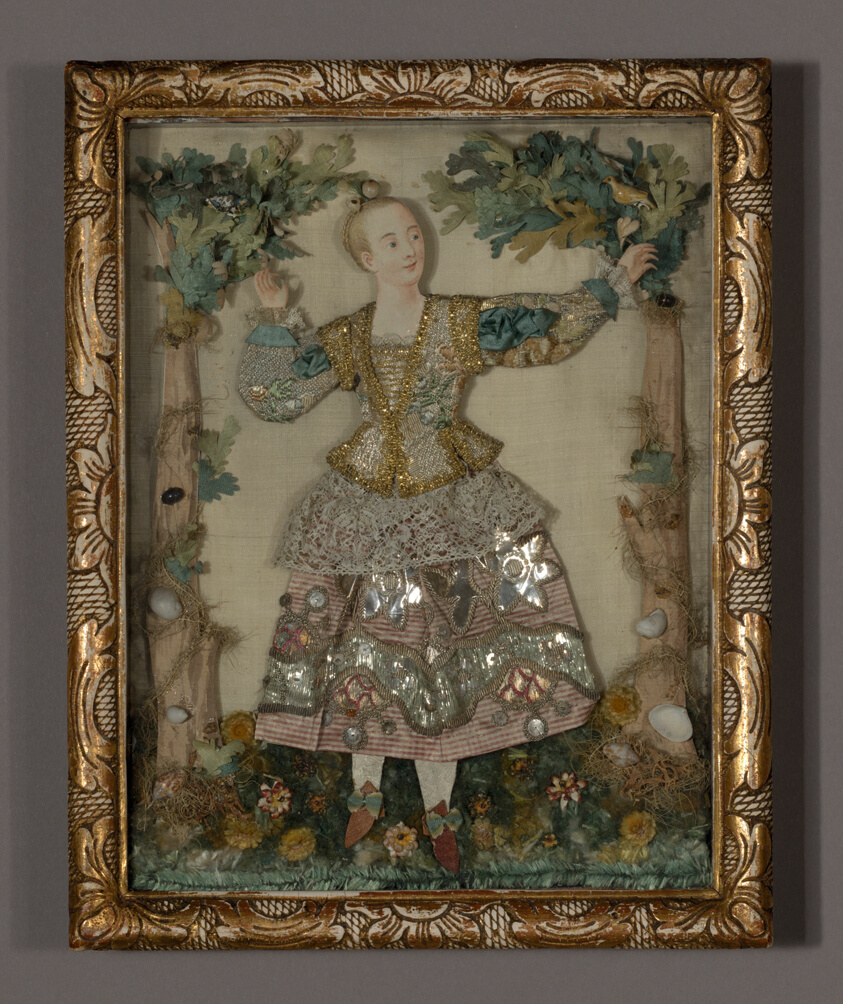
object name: Textile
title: Picture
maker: France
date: 18th century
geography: France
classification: textile; needlework (visual works)